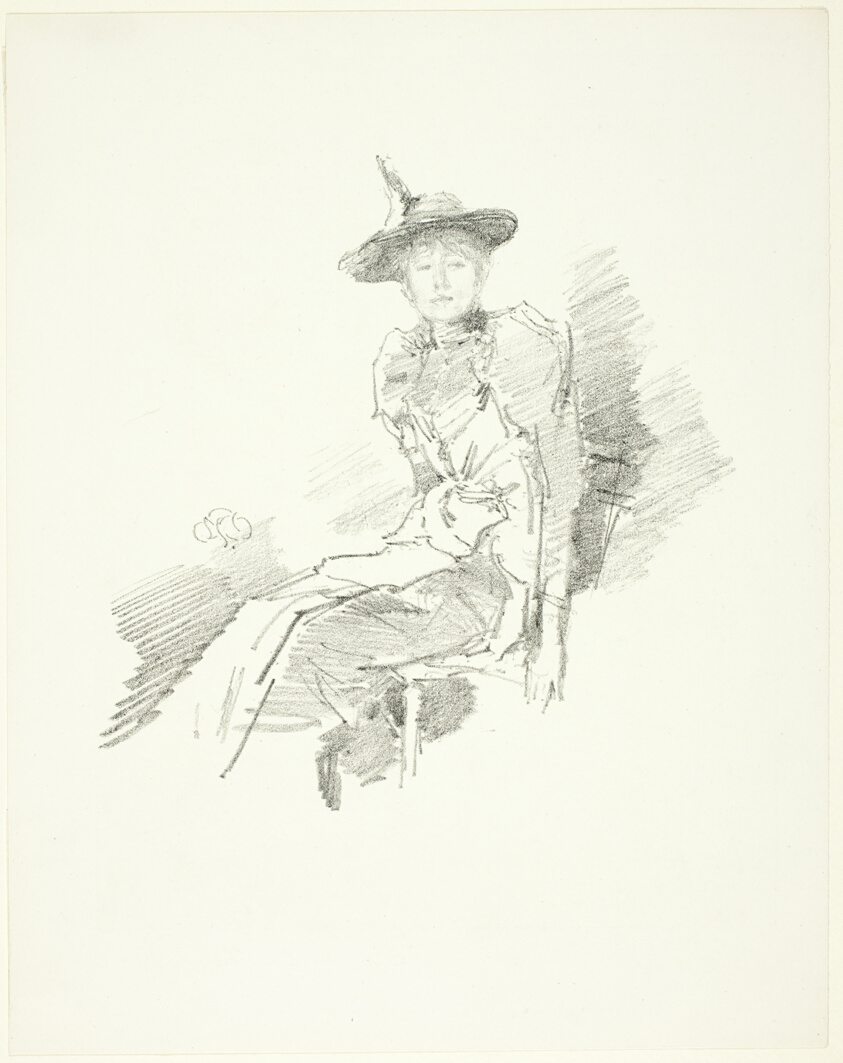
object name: Print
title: The Winged Hat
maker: James McNeill Whistler (American, 1834-1903)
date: 1890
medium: Transfer lithograph in black with scraping, on ivory wove paper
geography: United States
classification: transfer lithograph; lithograph; print; prints and drawing; paper